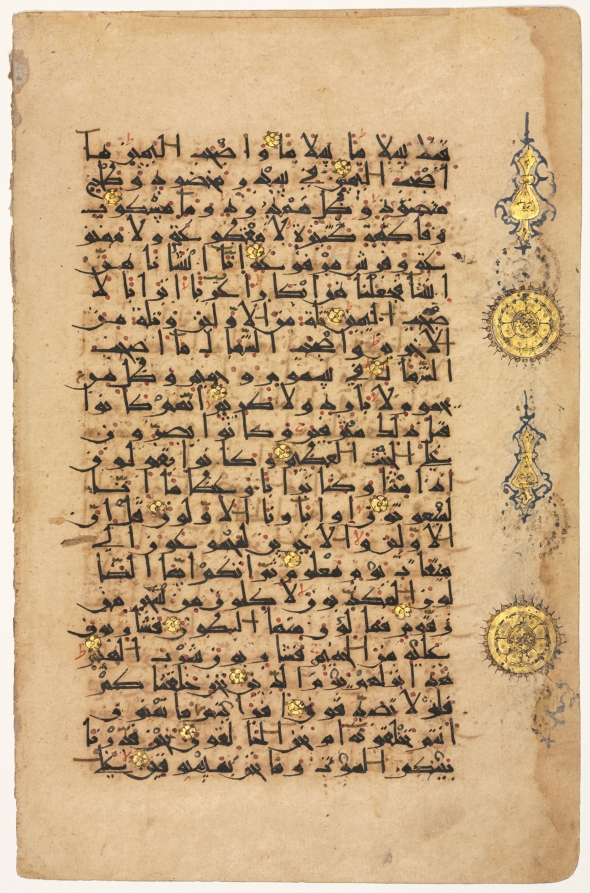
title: Page from a Qur'an (verso)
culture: Iran, Seljuq period (1037–1194)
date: 1100s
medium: ink, gold, and colors on paper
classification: Calligraphy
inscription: Sura al-Waqi'ah (56: part 26-part 61). Script: Eastern Kufi (twenty-three lines to a page)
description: East Persian ornamental Kufic (a script used for Qur’an transcriptions) in black, red, and gold fill this page, which is additionally decorated with gold and blue medallions on its border. Twenty-three lines from the Qur’an’s Sura al-Waqi'ah (The Event, or Day of Resurrection; 56: 1–26) constitute the text.